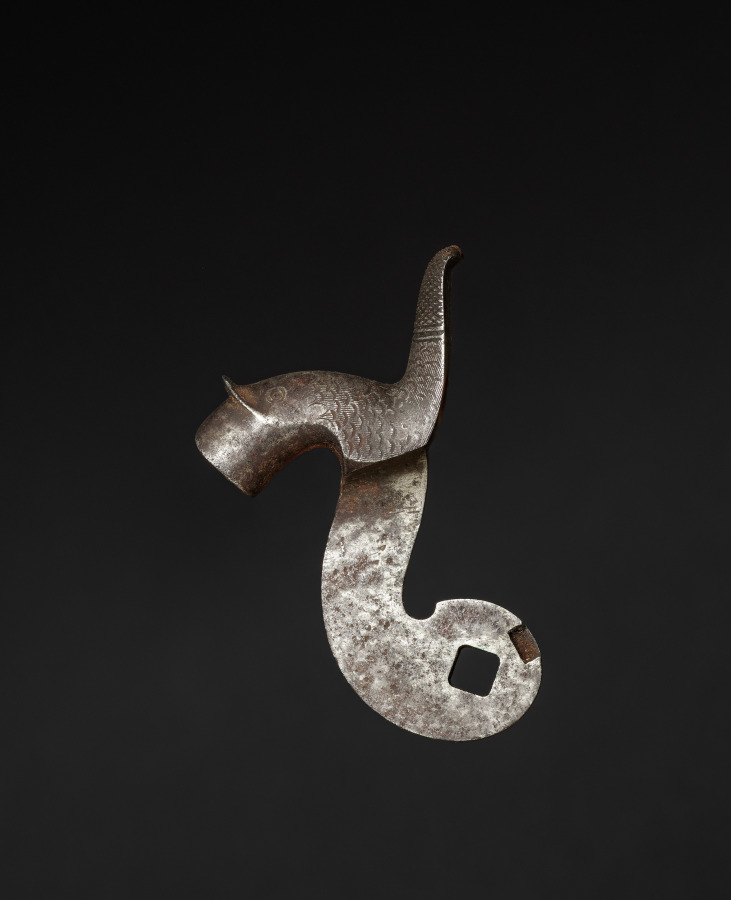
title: Gun-Lock Hammer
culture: England, early 19th century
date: c. 1800–1825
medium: steel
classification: Arms and Armor